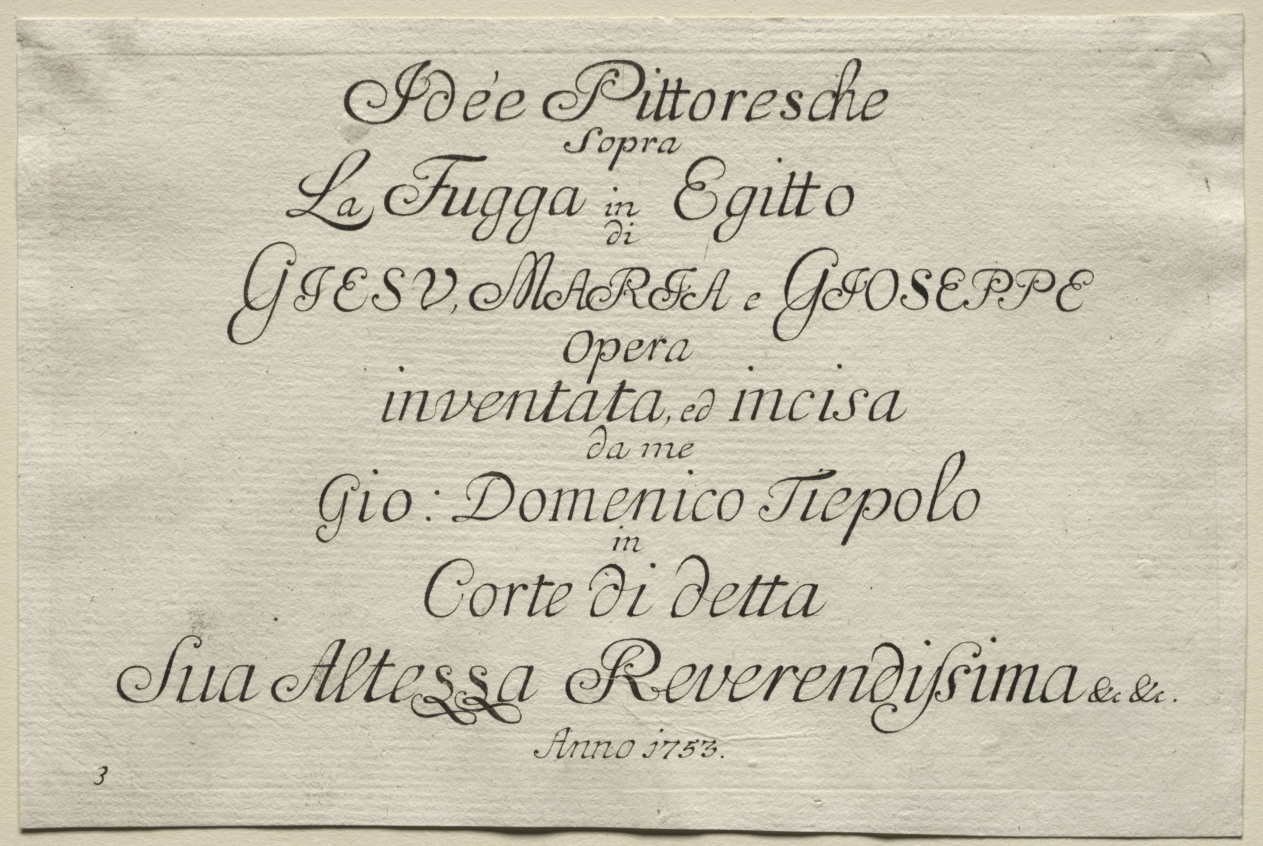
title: Flight into Egypt: Title Page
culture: Italy, 18th century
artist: Giovanni Domenico Tiepolo (Italian, 1727–1804)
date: 1750–53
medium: etching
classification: Print